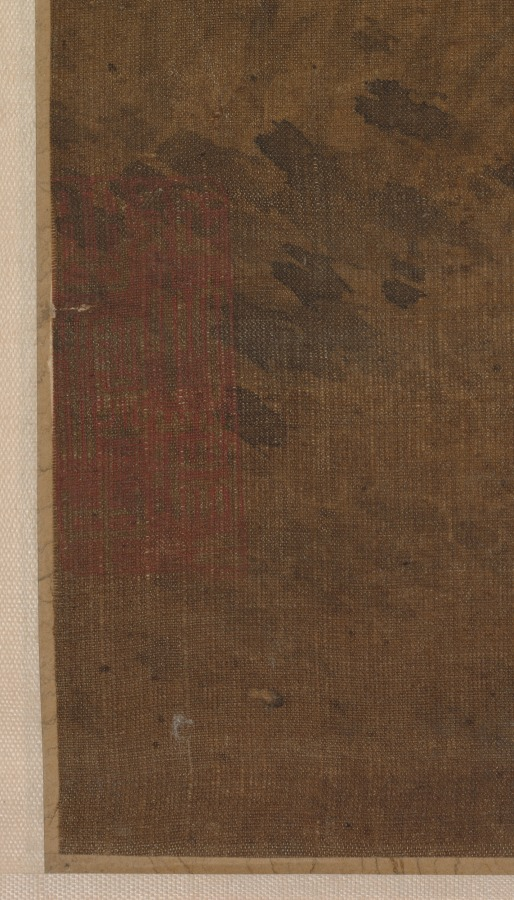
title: Bamboo in the Wind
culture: China, Qing dynasty (1644–1911)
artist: Ma Yu (Chinese, active 1706–1724)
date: 1724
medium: hanging scroll; ink on silk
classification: Painting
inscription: Artist's inscription and signature in upper left corner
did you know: In traditional Chinese culture, bamboo symbolizes a gentleman's virtuous resilience and flexibility.